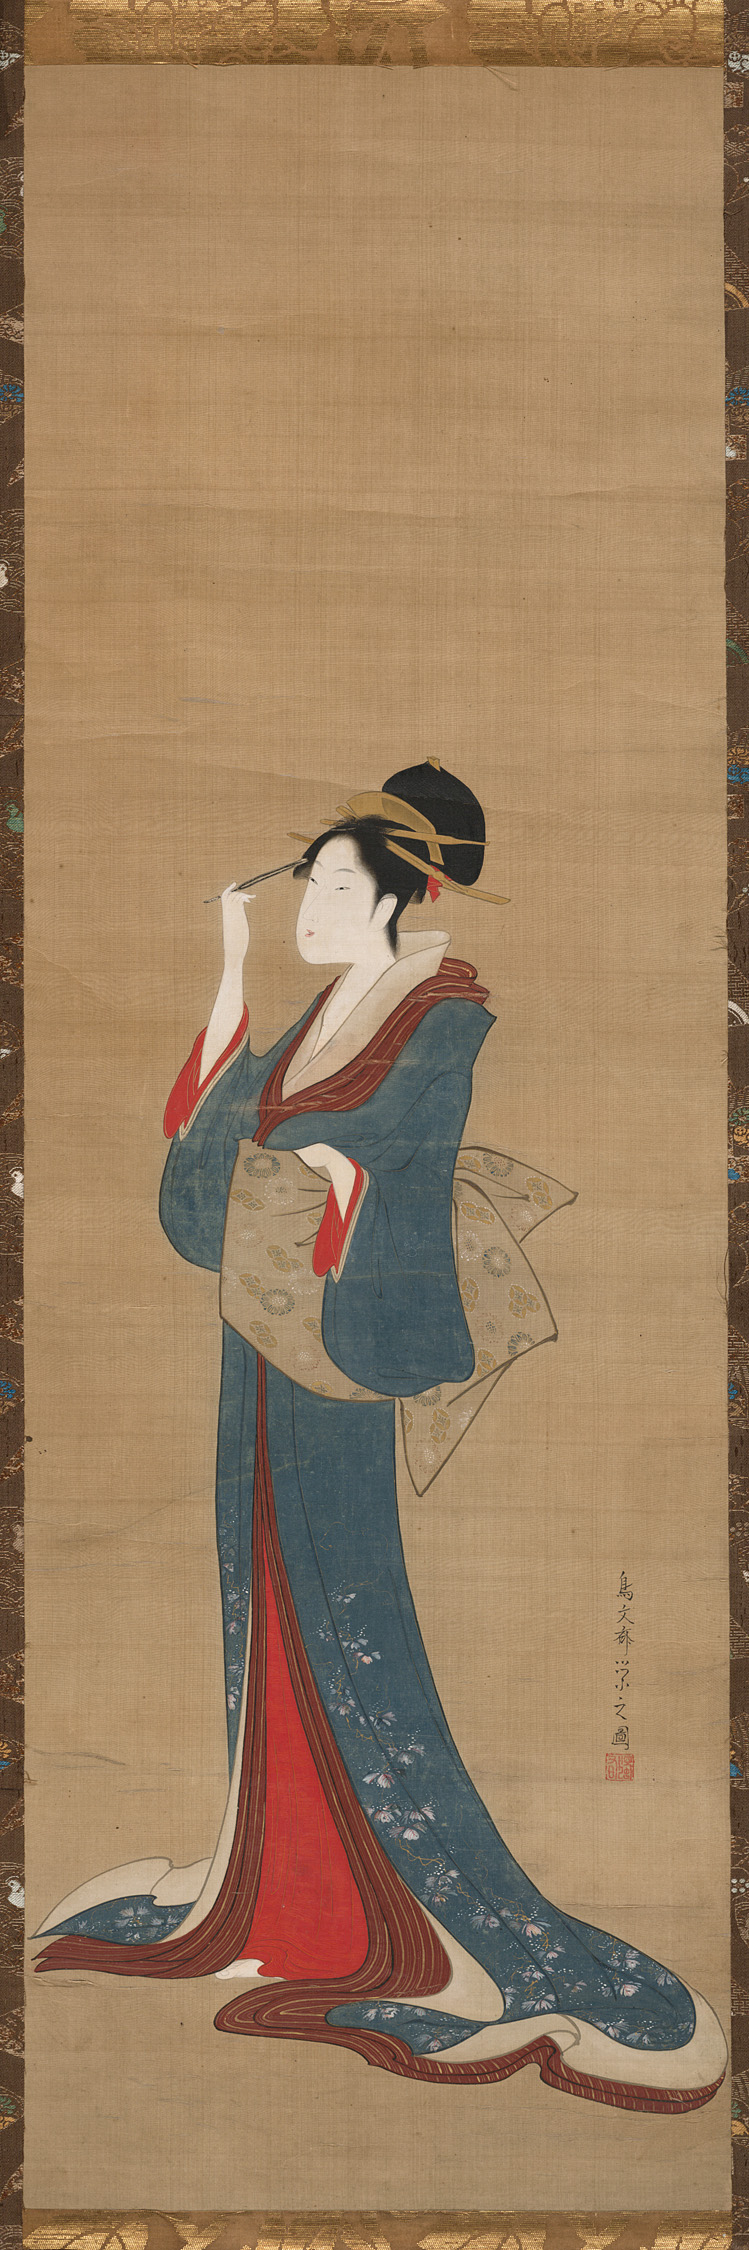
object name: Painting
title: Beauty Replacing Her Hairpin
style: Japanese (culture or style)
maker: Chôbunsai Eishi (Japanese, 1756-1829)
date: Edo period, 1798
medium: Hanging scroll; ink and color on silk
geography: Japan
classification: hanging scroll; painting; asian art